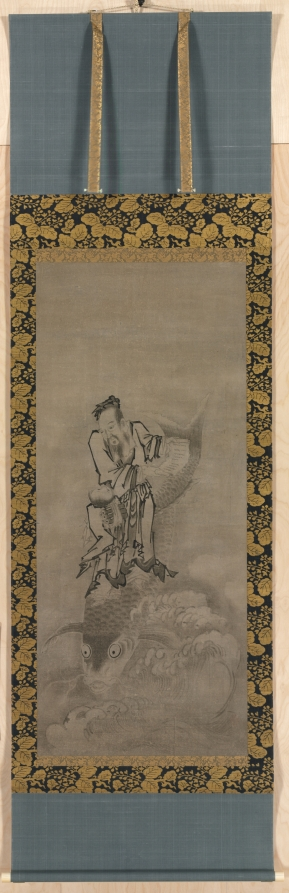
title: Hotei with Daoist Immortals: Immortal Riding Carp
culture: Japan, Edo period (1615–1868)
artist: Kyūseki Tomonobu (Japanese, 1653–1721)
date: late 1600s-early 1700s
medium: triptych of hanging scrolls: ink on paper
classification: Painting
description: Hotei was a Chan (Japanese: Zen) monk living in China during the 900s who, in the 1300s, became a legendary figure in Japan. At that time a popular cult praising him sprang up, extending beyond Zen to other religious communities. This rare triptych embraces a central Zen icon with flanking Daoist images, thereby suggesting the compatibility, rather than the exclusivity, of these two creeds. Hotei also enjoys popularity in Japan as a kind of genre, or folk figure, which explains his mirthful expression in Japanese paintings. The Daoist figures in contrast appear eccentric and foreign-looking, in keeping with Daoist lore. When these paintings came to the museum their appearance was compromised by poor quality textile mountings and cracked paper surfaces deserving of restoration. The fact that these scrolls constituted an integral set that properly had to be shown as a unit heightened the need to stabilize their condition and improve their presentation for museum visitors. A complete remounting of each scroll occurred following the cleaning of the paper surfaces and the repair of the lifting surface areas. No inpainting was done, thereby preserving the original ink values and brushstrokes.